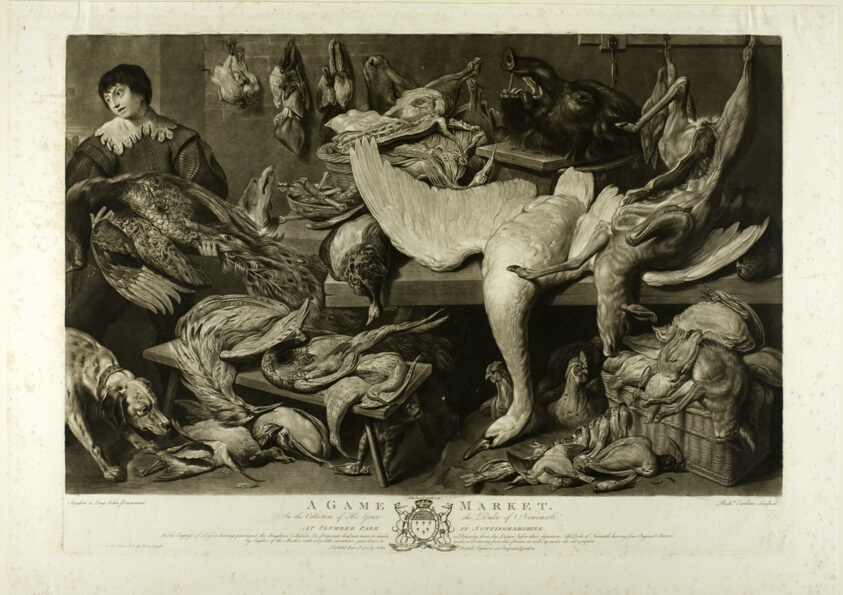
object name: Print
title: Game Market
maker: Richard Earlom (British, 1743-1822)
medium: Mezzotint on paper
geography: England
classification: mezzotint; print; prints and drawing